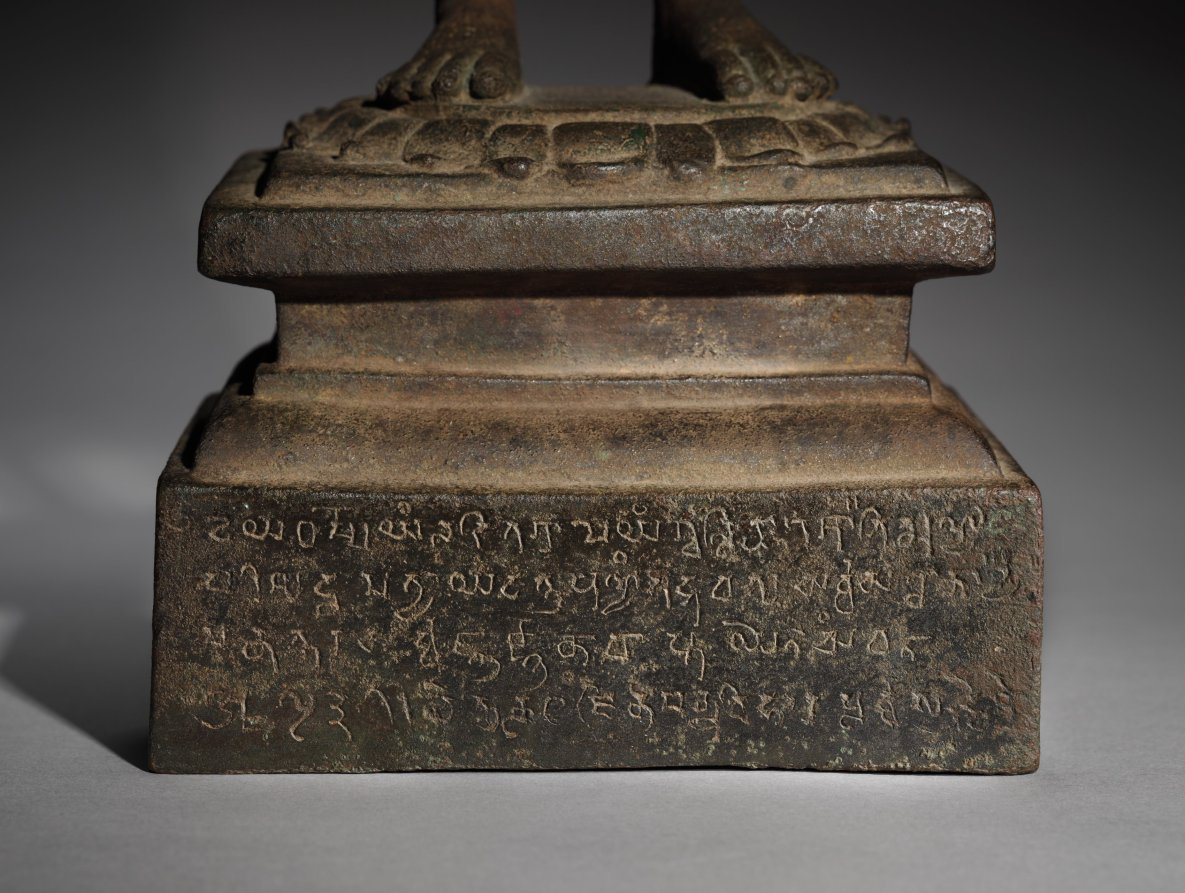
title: Standing Buddha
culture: Northern India, Uttar Pradesh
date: 591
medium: bronze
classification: Sculpture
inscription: 1. ṹ deyadharmmoyaṃ laḍitagrāme yaṃgvalvihāre śā[kya] bhikṣuṇyā 2. pariśuddhamatyā yadattra puṇyaṃ tadbhavatu sarvvasatvānā- 3. manuttarasarvva jñānāvāptaye/ / saṃvat 4a. 500 10 3/ / caityakūta jinabandhuvihārapūrvva-bhuddeśe 4b. piṇḍakena bhojanaṃ karttavya*/ / *Mistake for karttavyam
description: This bronze Buddha is exceptional, because it carries an inscription on its base that dates its manufacture to the year 591. According to the inscription, the sculpture was dedicated by a nun who was from a village in Nepal, but she probably commissioned it at a workshop in northern India. The Buddha's robe on this image has been left plain, without pleat lines to obscure the beauty of the contours of the body. Only the rippling scalloped clusters of the garment’s hem lend some sense of energy and subtle ornament to the composition.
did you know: Around the time when this sculpture was made, portable bronzes began to replace relics as the principal sacred commodity circulating in the Buddhist world.